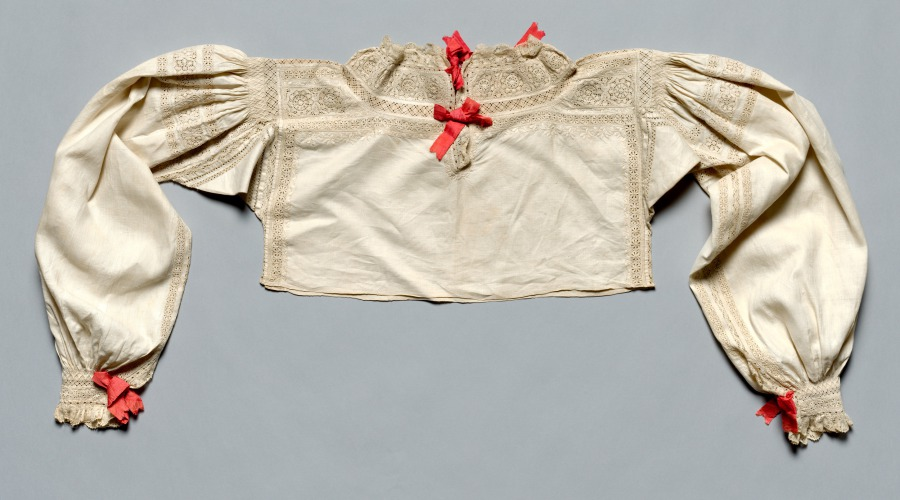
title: Linen Blouse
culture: Hungary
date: early 1900s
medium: linen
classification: Garment